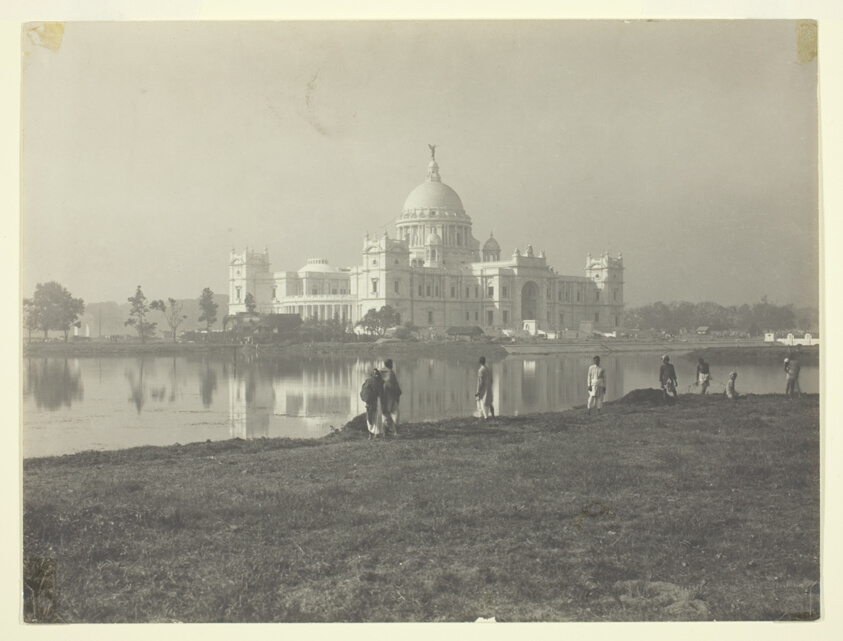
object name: Photograph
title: Victoria Memorial at Calcutta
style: 19th century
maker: Johnston & Hoffmann (British, 19th–20th century)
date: Early 20th century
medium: Gelatin silver print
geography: United Kingdom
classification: photography; gelatin silver (developing-out-paper) pr; photographic process; photograph